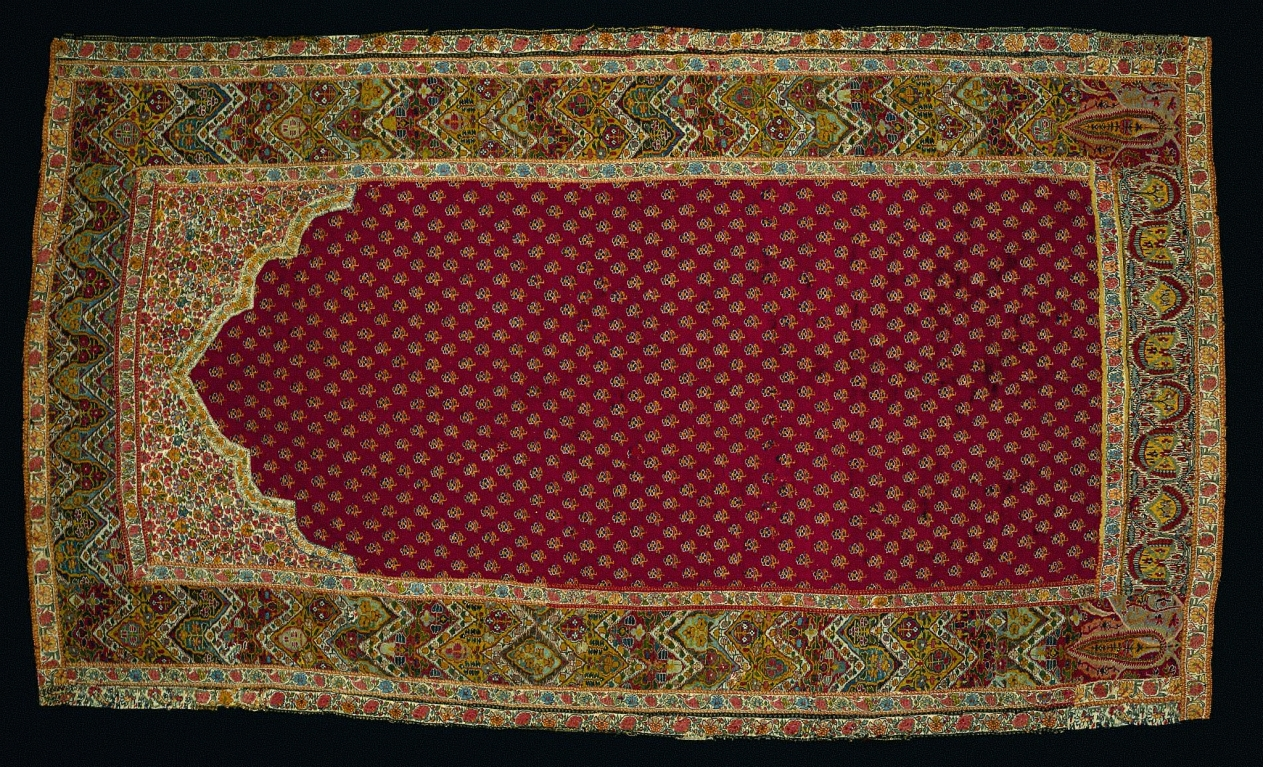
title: Hanging with niche design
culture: India, late 18th - early 19th century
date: late 18th - early 19th century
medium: 2 1/2 twill tapestry weave [S] with double interlock, pieced:wool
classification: Textile